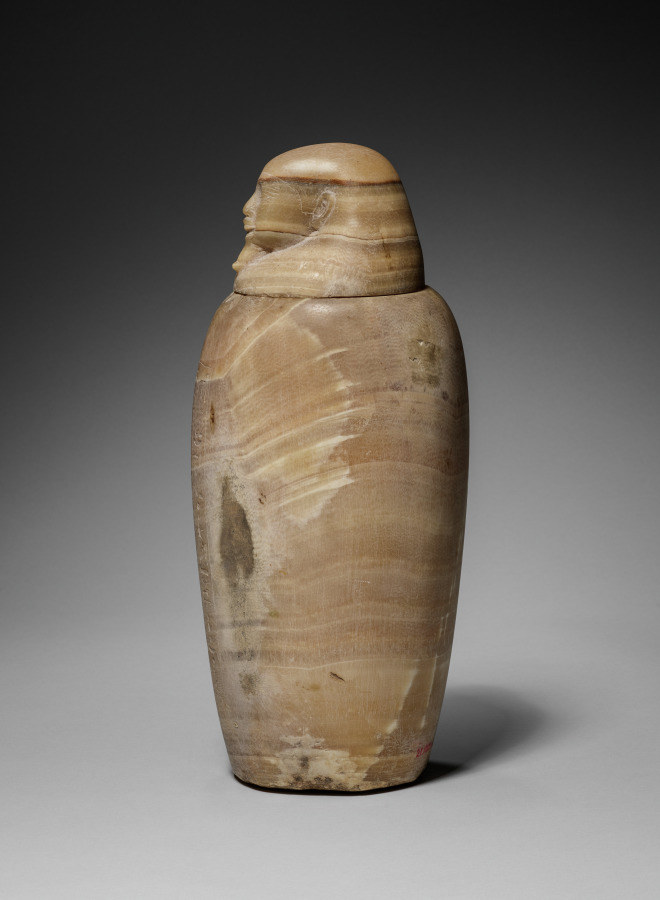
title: Canopic Jar with Man's Head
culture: Egypt, Late period (715–332 BCE), Dynasty 26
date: 664–525 BCE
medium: travertine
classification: Funerary Equipment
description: In the process of mummification, the liver, lungs, stomach, and intestines were removed, separately embalmed, and stored in specialized jars known as canopic jars (after a sailor in Greek mythology, who died at the town of Canopus in the Nile Delta and was worshipped there in the form of a human-headed jar). Each organ was identified with one of four funerary deities collectively known as the Sons of Horus: the liver with Imsety (man's head), the lungs with Hapy (baboon's head), the stomach with Duamutef (jackal's head), and the intestines with Qebehsenuef (falcon's head). It was their duty to protect the deceased and restore to him his body parts in the hereafter.